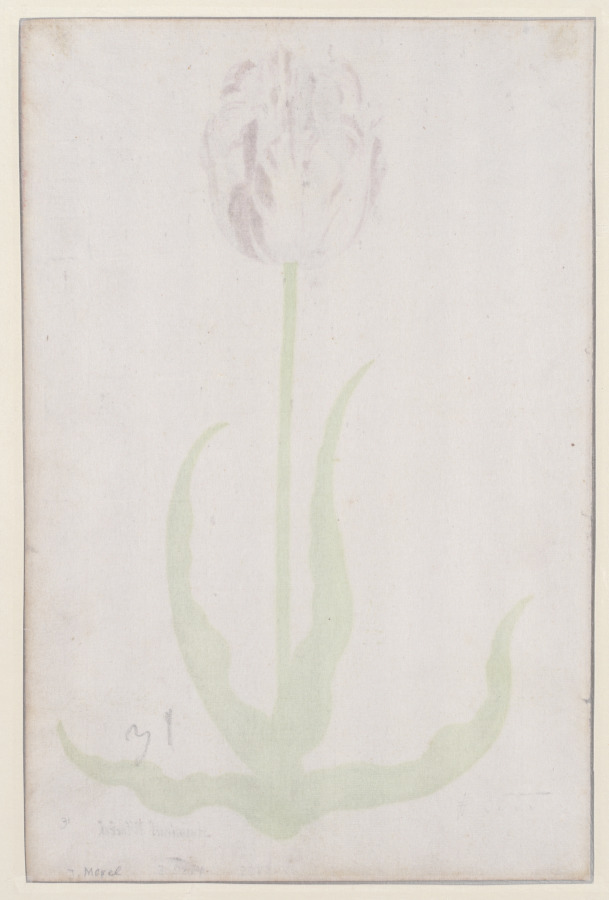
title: Study of a Tulip (Ammirael Winckel)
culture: Netherlands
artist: Pieter Holsteyn II (Dutch, c.1612–1673)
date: c. 1645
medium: brush and watercolors in crimson, grey and green over traces of charcoal on antique laid paper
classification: Drawing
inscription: Recto, Ammirael Winckel. in black ink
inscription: Bottom border, cut off, Ammirael Winck in brown in (different hand)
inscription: Verso: J Morel and 31 and 31 in graphite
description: This image of a tulip was made as part of a tulip book used as a grower’s marketing tool during the so-called tulip mania, a speculative bubble in 17th-century Holland when ten tulip bulbs could cost more than a stately Amsterdam canal house. The striations on the tulip, which were caused by a virus in the bulb, made it especially valuable. Pieter Holsteyn II was one of many artists in the Netherlands at the time who specialized in botanical illustration. This tulip's Dutch name, inscribed on the sheet, translates to "Admiral Winckel." Winckel was the family name of one of the largest growers of tulips in the period.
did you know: In 17th-century Holland, some tulip bulbs were as expensive as a stately Amsterdam canal house!